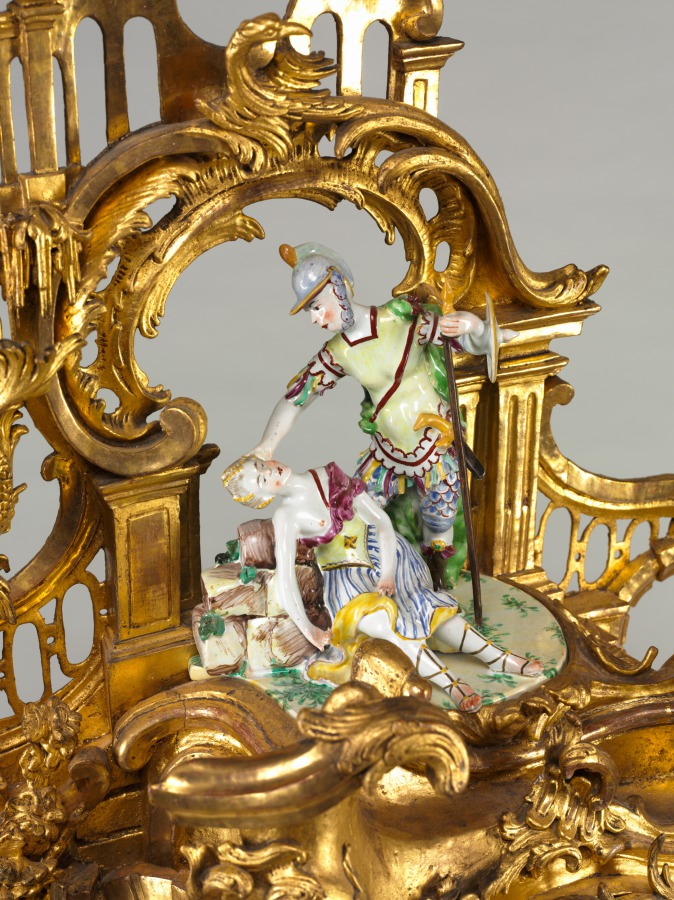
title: Clock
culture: Germany, 18th century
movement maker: Baumgartinger (German)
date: c. 1750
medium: carved and gilded wood, faience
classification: Furniture and woodwork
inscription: inscribed on face: Baumgartnger [sic] Mergentheim.